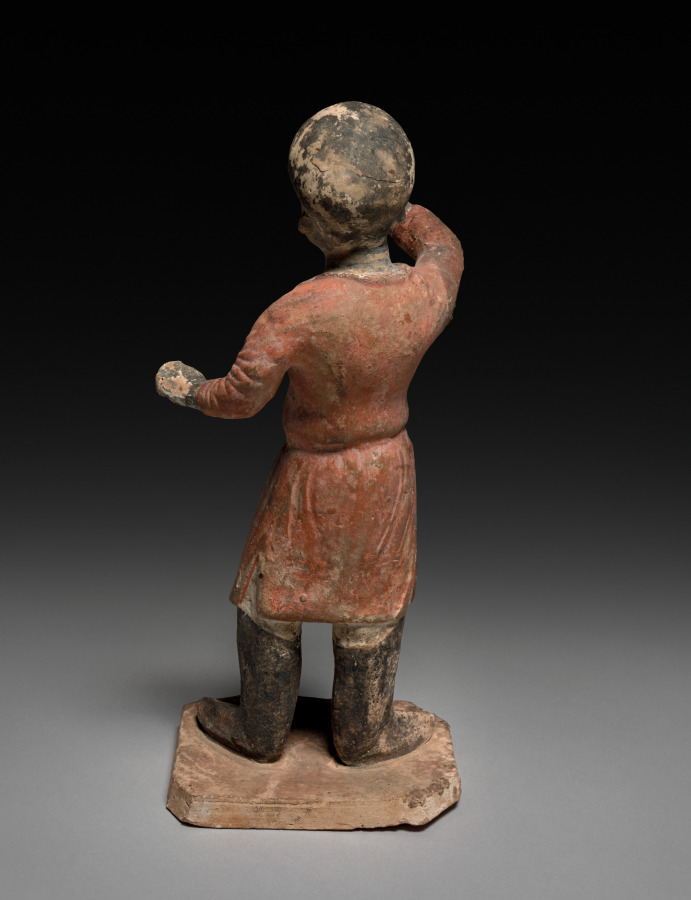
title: Groom (Tomb Figure)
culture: China, Sui dynasty (581-618) - Tang dynasty (618-907)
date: late 500s–early 600s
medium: buff earthenware with polychromy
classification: Sculpture